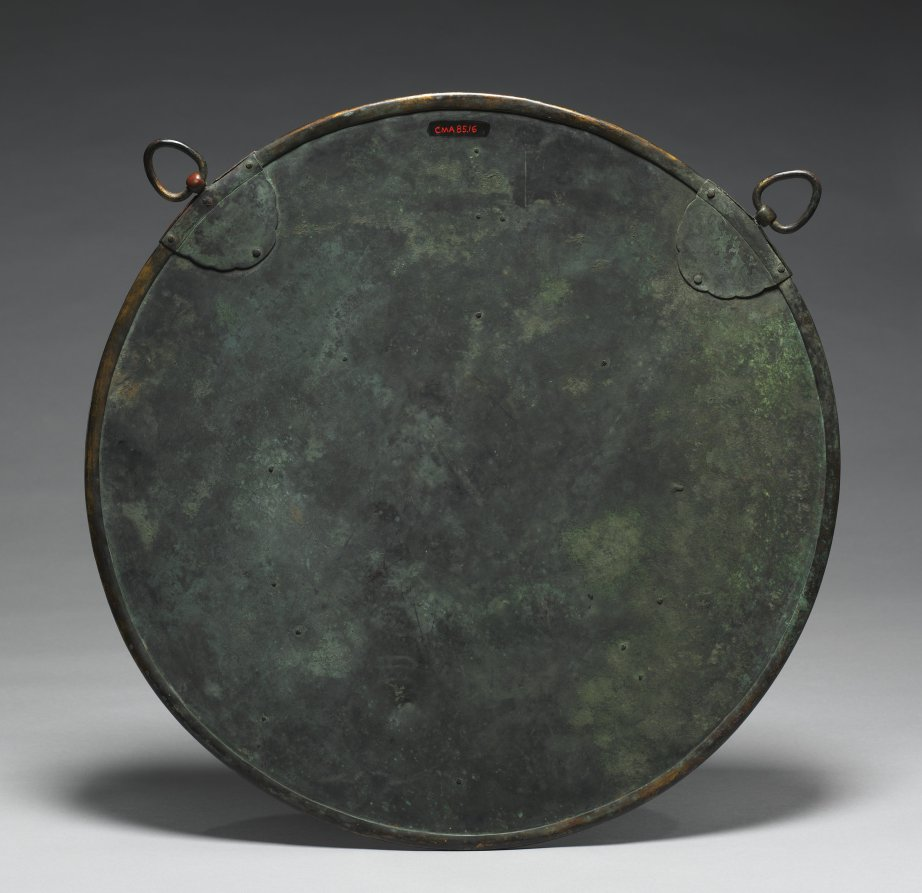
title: Votive Hanging with Image of Kannon (Kannon Kakebotoke)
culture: Japan, Nanbokuchō period (1336–92)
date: mid- to late 1300s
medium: Bronze with repoussé and etching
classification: Sculpture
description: Kakebotoke (literally “hanging Buddhist deities”) like this appeared from the latter part of the Heian period. They often hung on the doors of a Shinto shrine hall to indicate the Buddhist manifestation of the god, or kami, inside, or along the eaves of a Buddhist temple hall to indicate the Buddhist deity celebrated there.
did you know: Here the deity Kannon sits on a lotus flower, a symbol of purity and enlightenment.